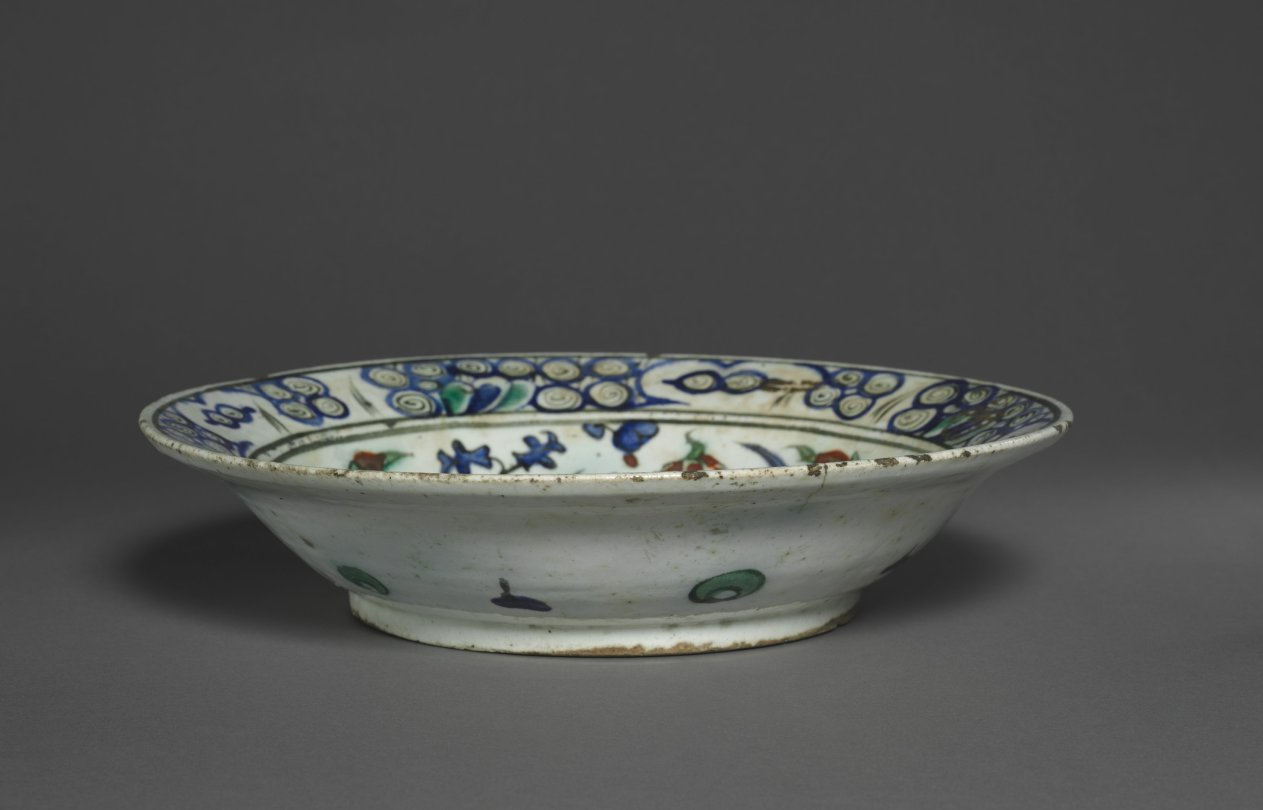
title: Gilded Dish with Flowers and Leaves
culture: Turkey, Iznik, Ottoman period (1299–1922)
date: c. 1590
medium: Fritware with red slip, underglaze design, and overglaze gilding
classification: Ceramic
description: This floral design highlights the rich red, the most difficult to achieve in ceramics, that was developed by Turkish potters. The design is divided with a central swaying saz leaf, with red roses, blue hyacinths, and other floral elements enhanced with glittering gold, a feature that rarely survives. The rim displays a simplified “rock and wave” design adopted from Chinese ceramics which were abundant in the imperial Topkapi Palace in Istanbul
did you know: Turkish potters developed the red color with a clay slip rich in iron.